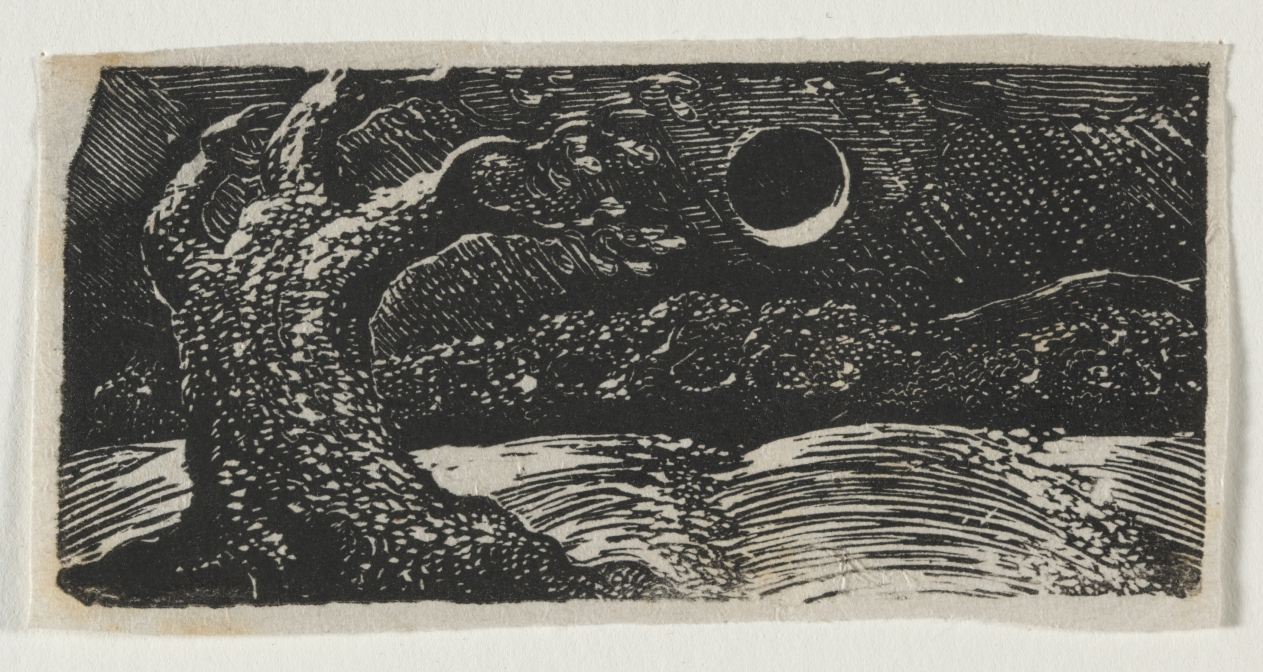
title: The Pastorals of Virgil, Eclogue I: The Blasted Tree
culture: England, 19th century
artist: William Blake (British, 1757–1827)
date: 1821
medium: wood engraving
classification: Print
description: William Blake conceived and engraved 17 designs for Dr. Robert John Thornton’s The Pastorals of Virgil, a popular schoolbook used in teaching Latin. The publication included translations of poems by ancient Roman author Virgil that focus on a rural setting as both a subject matter and as the background for discussions of various issues, from love to politics. Blake’s illustrations reveal his emphasis on the natural world. As his only wood engravings, they also show how the process entails cutting away from the woodblock to create lighter sections, in essence working in white over a black background. Here, several areas—such as the textures of the trees—emphasize that point.